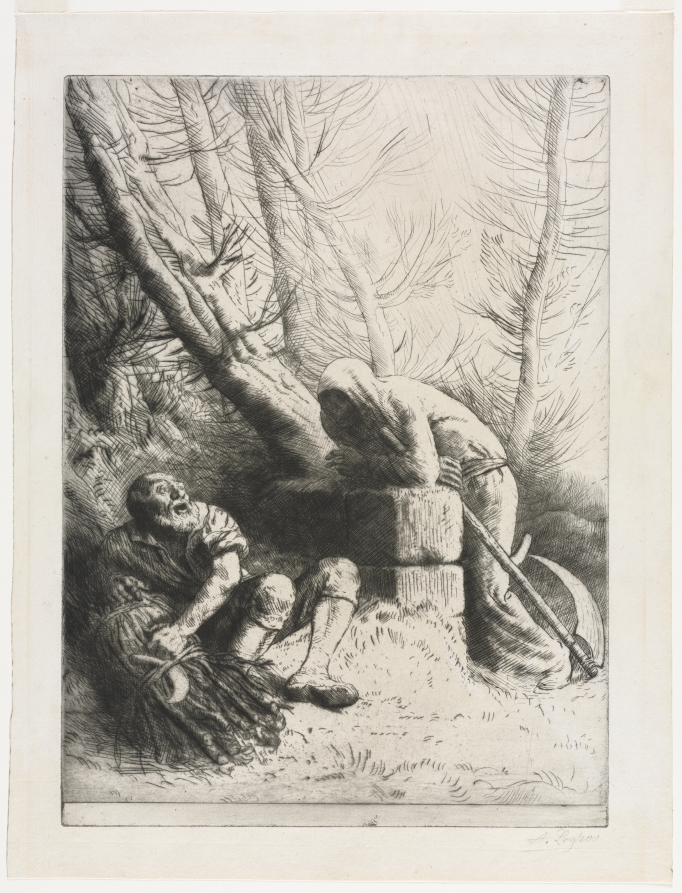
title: Death and the Woodcutter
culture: France, 19th century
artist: Alphonse Legros (French, 1837–1911)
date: 1881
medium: etching and drypoint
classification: Print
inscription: signed in graphite right: A Legros